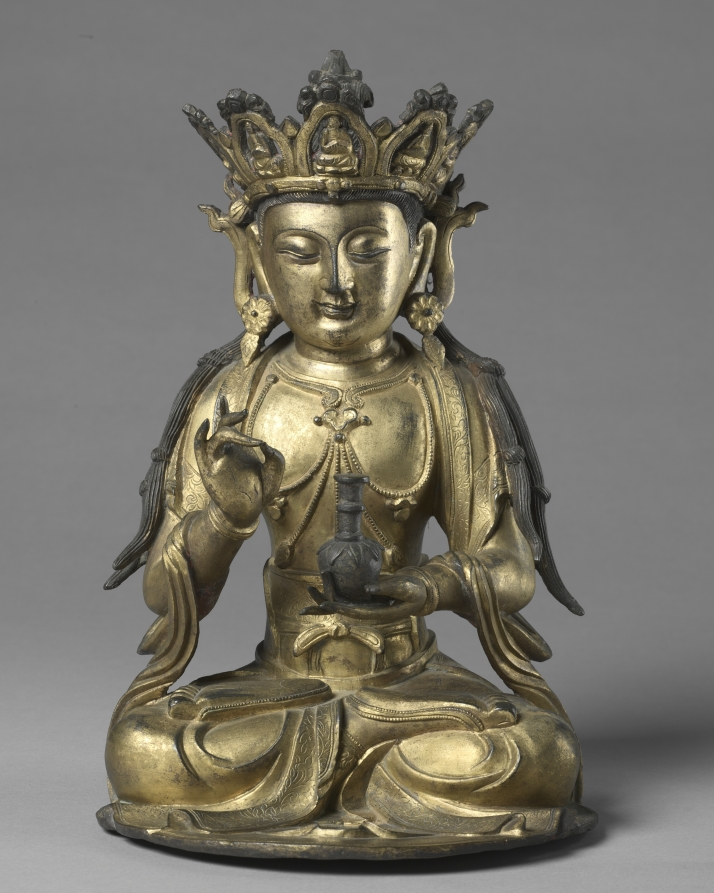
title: Seated Guanyin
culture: China, Ming dynasty (1368–1644)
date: 1368–1644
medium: gilt bronze with polychromy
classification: Sculpture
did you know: This bronze sculpture was created using the lost wax method of casting.